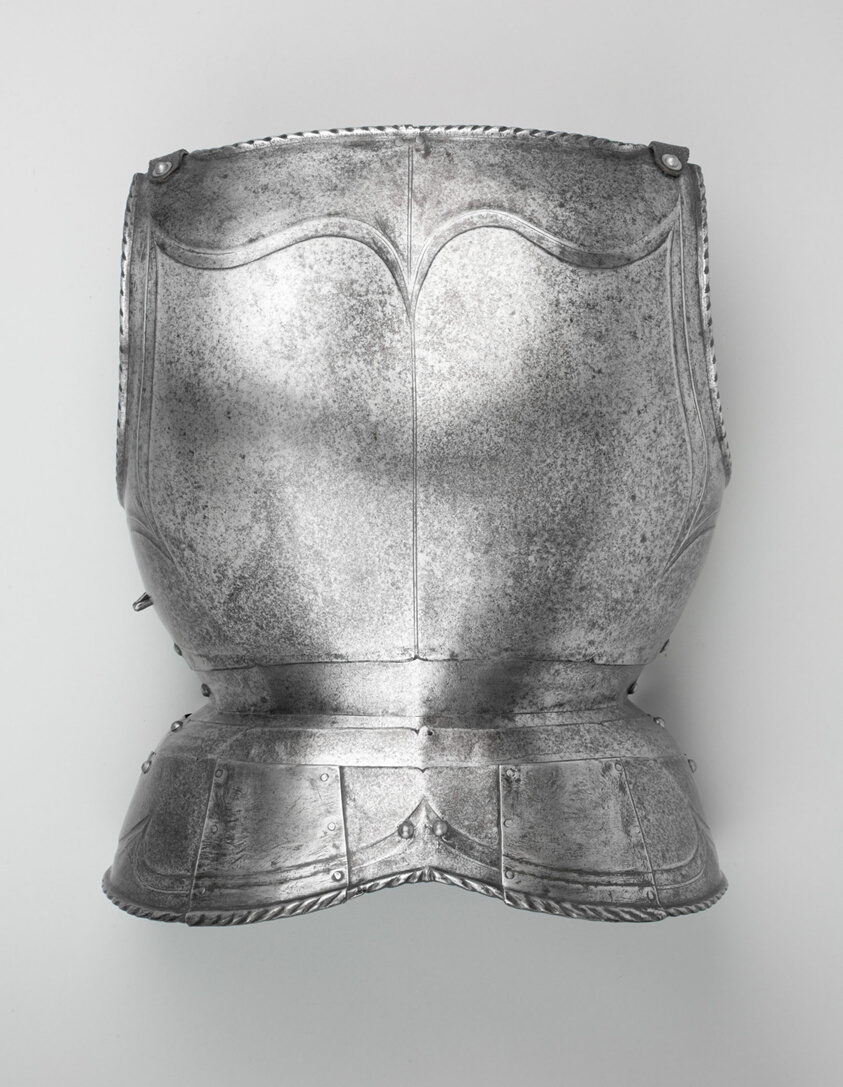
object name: Armor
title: Backplate with Fauld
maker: Southern German, Nuremberg(?)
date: 1525/75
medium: Steel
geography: Southern Germany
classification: suit-element; armor; arms and armor